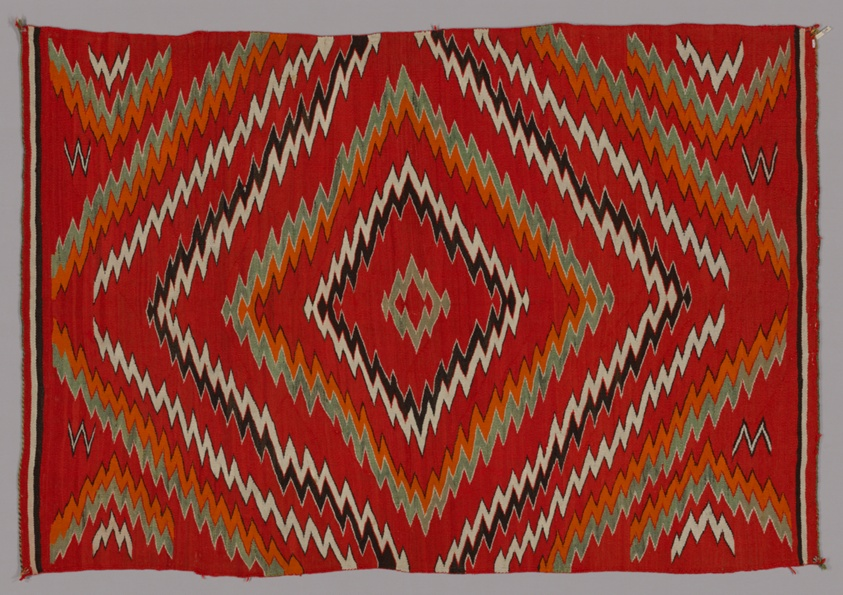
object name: Textile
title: Wearing Blanket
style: navajo, native american, americas, Arts of the Americas, indigenous, north american, native north american, eye-dazzler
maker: Unknown weaver; Navajo (Diné), active late 19th century; Navajo Nation (parts of Arizona, New Mexico, and Utah)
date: c. 1885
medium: Wool, wedge tapestry weave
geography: Navajo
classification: blanket (covering); textile; art of the americas; costume; weaving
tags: geometric motif, zigzags